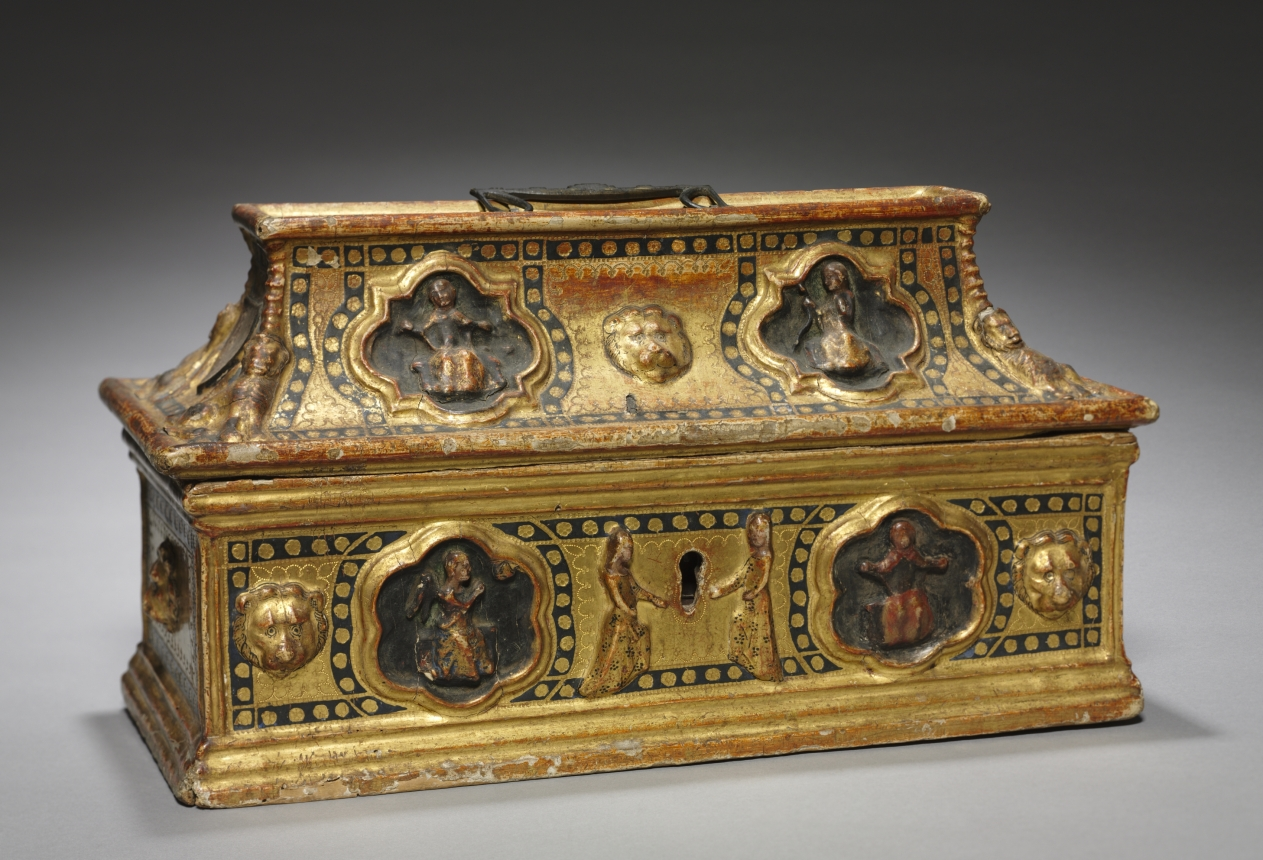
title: Casket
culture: Italy, Siena(?)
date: late 1300s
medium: painted and gilded gesso on wood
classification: Furniture and woodwork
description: This casket is one of only a few of its kind to survive in such a fine state of preservation. A variety of such caskets were used in wealthy homes to store jewelry, seals, mirrors, and combs. A keyhole lock is provided for security. Caskets like this were often highly decorated and given to women as gifts.